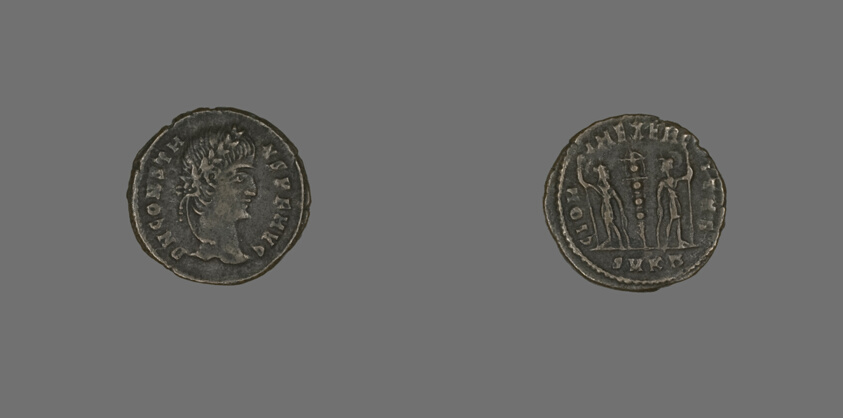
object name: Coin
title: Coin Portraying Emperor Constans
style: roman (ancient, style or period), ancient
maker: Roman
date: 337-350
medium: Bronze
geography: Roman Empire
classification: coin; ancient art